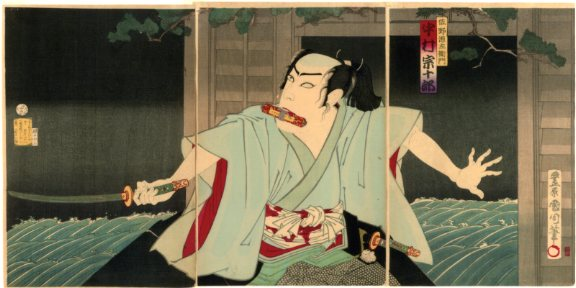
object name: Print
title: Nakamura Sōjūrō I as Sano Genzaemon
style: Japanese (culture or style)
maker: Toyohara Kunichika (Japanese, 1835-1900)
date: 1885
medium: Color woodblock print; ōban triptych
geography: Japan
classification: woodblock print; print; asian art